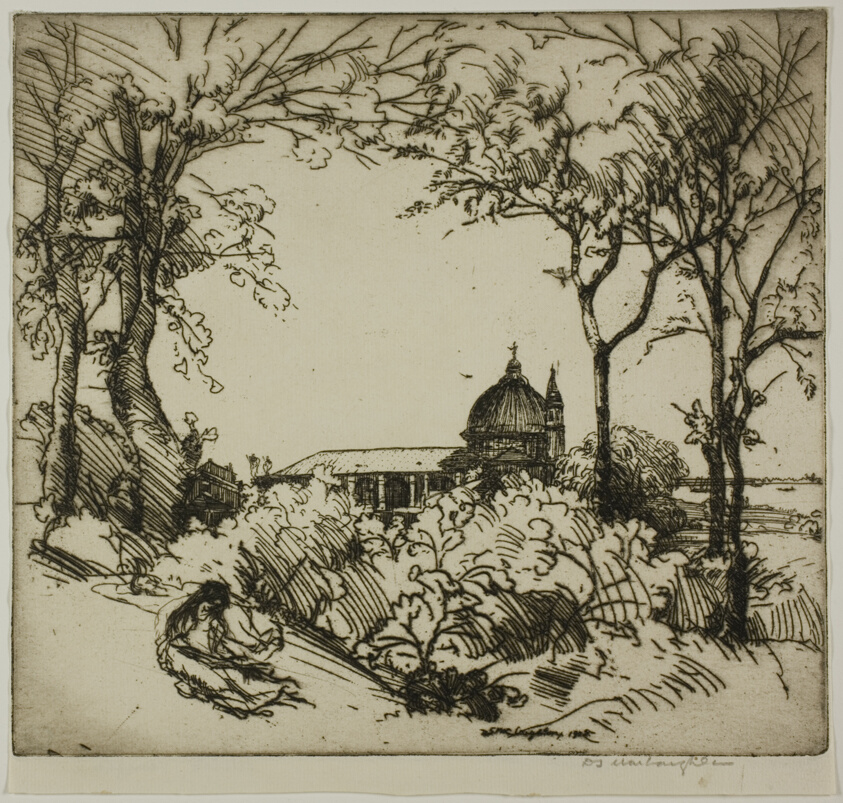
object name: Print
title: Idillio, Venezia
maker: Donald Shaw MacLaughlan (American, born Canada, 1876-1938)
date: 1908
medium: Etching in black on cream laid paper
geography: United States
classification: etching; print; prints and drawing